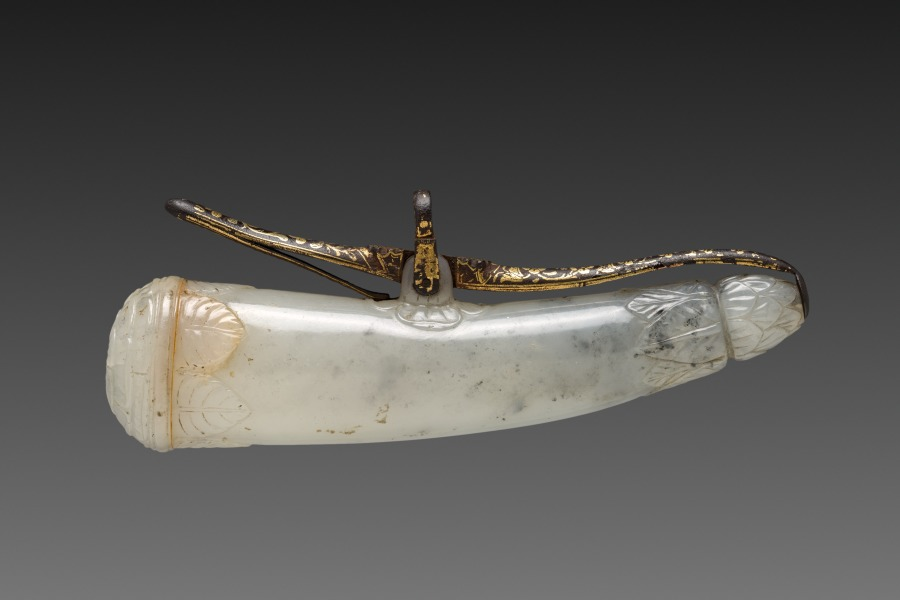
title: Powder horn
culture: India, Mughal, 17th-18th century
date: 1600s-1700s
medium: Jadeite, iron inlaid with brass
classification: Jade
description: Like the firearms themselves, powder horns were made as courtly accessories to be worn as objects of beauty. Most Mughal nobles also served as military commanders, and accouterments of war would be worn as part of their formal attire. For this reason, artisans used precious materials such as white jade, which in this example has been carved with leaf and petal patterns, its natural black inclusions treated as ornament. Pressing down on the simple mechanism opens the hollow inner chamber from which small amounts of gunpowder were administered into the pan of a matchlock musket.